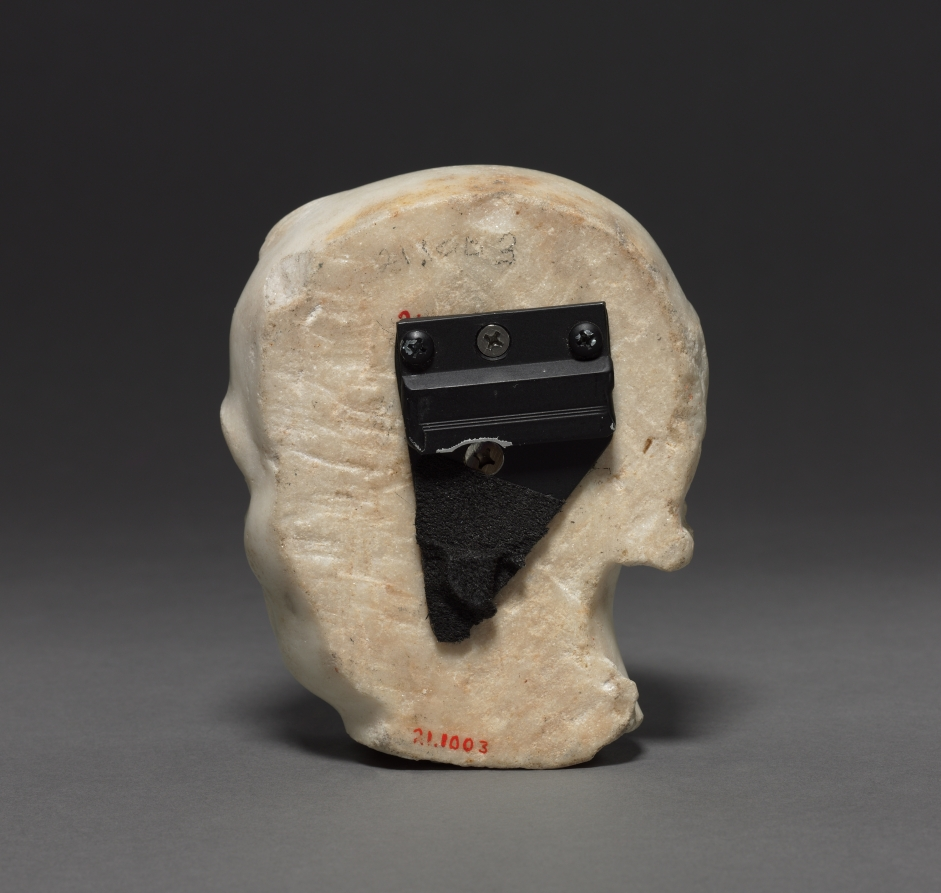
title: Head of a Man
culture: France, 15th century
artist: circle of Michel Colombe (French, c. 1430–c. 1513)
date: 1520–1525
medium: marble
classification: Sculpture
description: The original context and function of these two marble heads are unknown. They are presumed to have been part of a relief sculpture from a château, perhaps in the Loire region, or else from a tomb sculpture. Their style is reminiscent of sculptures produced by Michel Colombe, a prominent sculptor active in the Loire Valley in the service of aristocratic and royal patrons, and may have been carved by a close follower or member of his workshop.